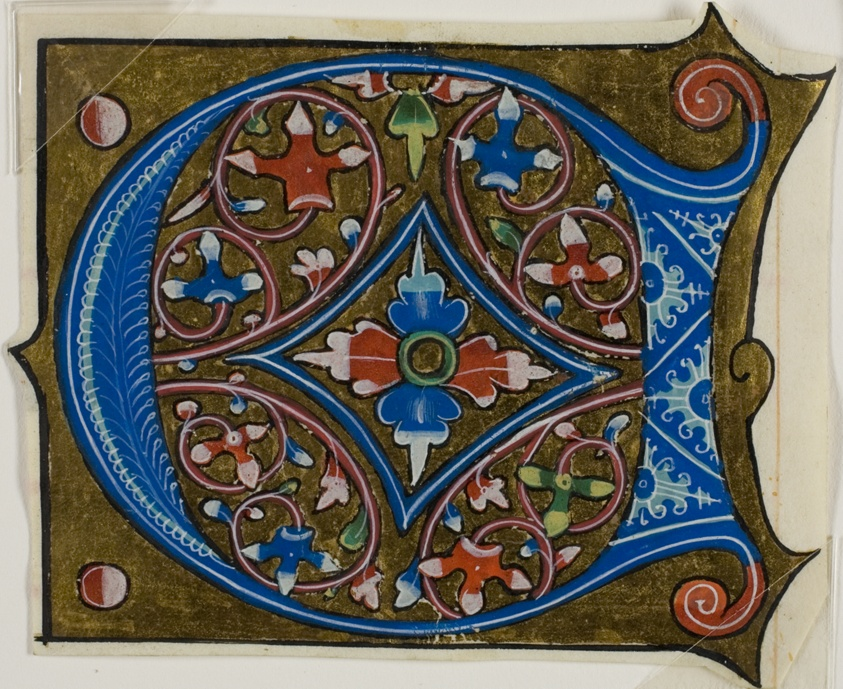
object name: Drawing and Watercolor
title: Decorated Initial "D" with Leaves and Two Balls from a Choir Book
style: medieval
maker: French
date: 15th century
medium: Manuscript cutting in tempera and gold leaf on vellum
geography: France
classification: tempera; manuscript; drawings (visual works); prints and drawing